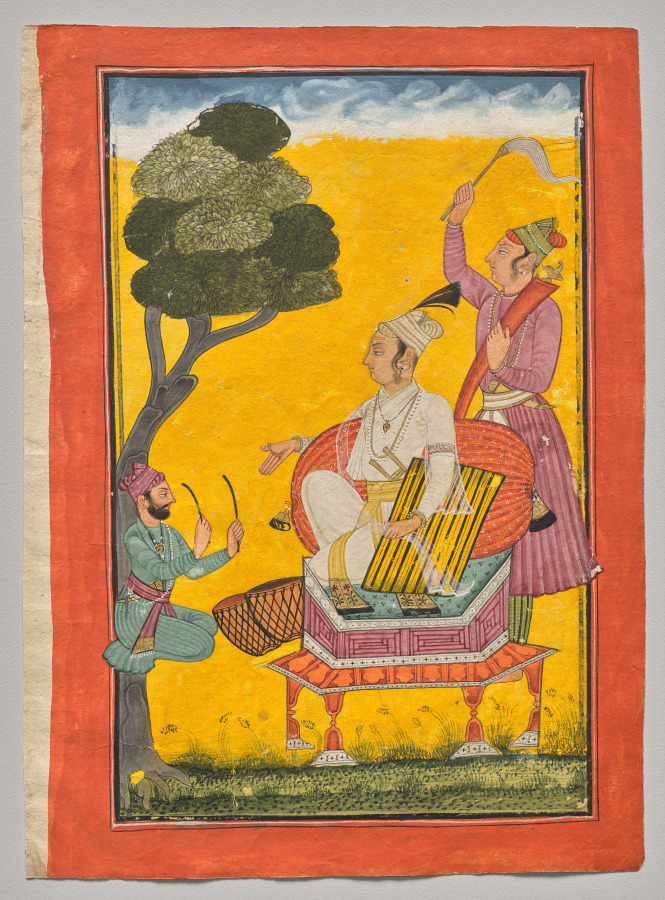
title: Vivaca Ragaputra, a Leaf from Ragamala Series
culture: India, Pahari Hills, Bilaspur school, 18th century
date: c. 1700–1720s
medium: Gum tempera and gold on paper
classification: Painting